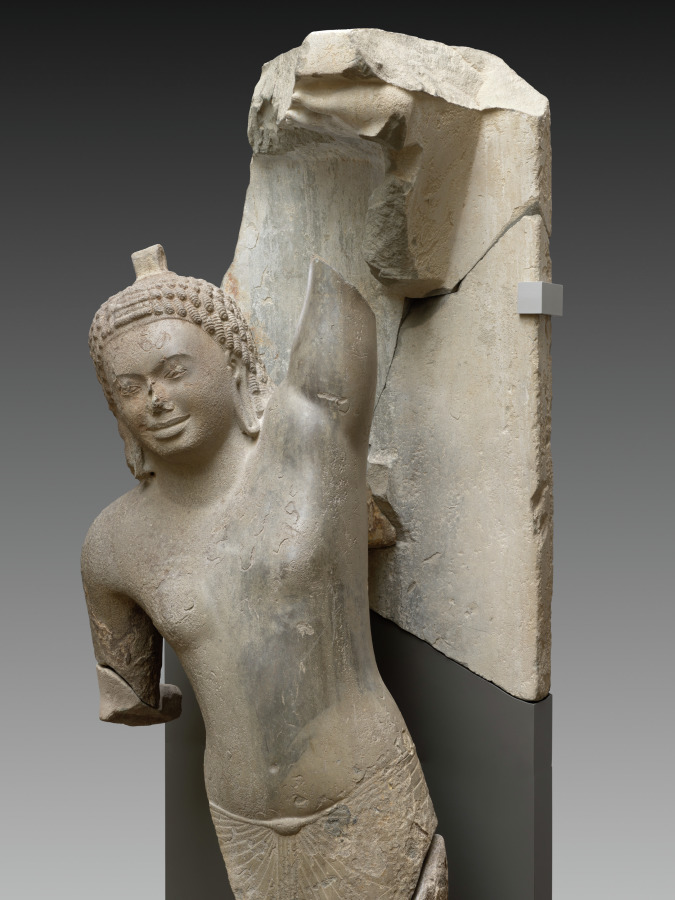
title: Krishna Lifting Mount Govardhan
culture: Southern Cambodia, Takeo Province, Phnom Da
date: c. 600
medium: Sandstone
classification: Sculpture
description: This masterwork of early Cambodian sculpture shows the Hindu god Krishna effortlessly holding aloft a mountain to protect his fellow villagers and herds from torrential storms sent by a jealous old god. It is one of eight monumental monolithic figures recovered from a two-peaked mountain in the floodplains of the Mekong River delta, on the outskirts of the ancient urban center of Angkor Borei.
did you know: Gold earrings were once fastened to the sculpture using holes in the figure's earlobes.